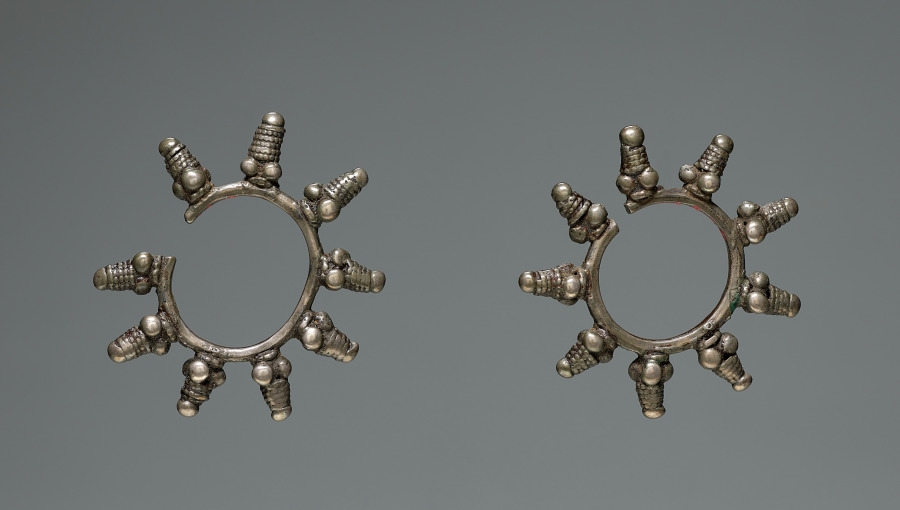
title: Pair of Earrings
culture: India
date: 1800s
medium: silver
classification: Jewelry